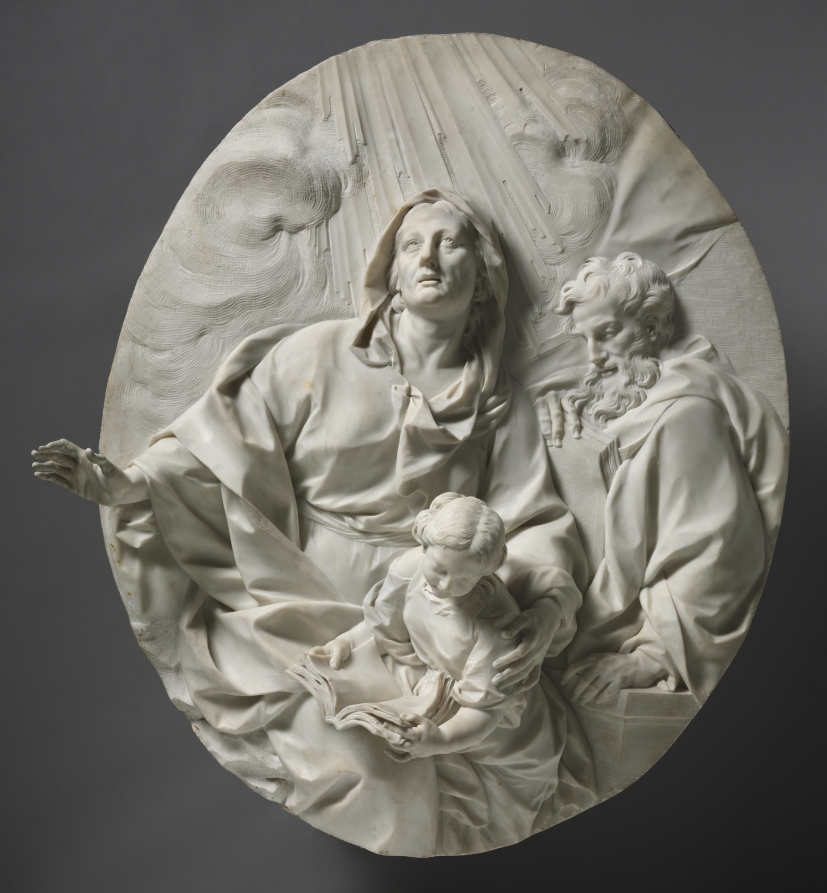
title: Education of the Virgin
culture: Italy, Rome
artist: Giuseppe Mazzuoli (Italian, 1644–1725)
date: c. 1700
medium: marble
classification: Sculpture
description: During the Counter-Reformation, the Roman Catholic Church increasingly upheld Saint Anne, the Virgin Mary’s mother, as an example of virtuous motherhood, particularly in emphasizing her daughter’s religious education. Its graceful composition also connects to the idealized, elegant work of Guido Reni.